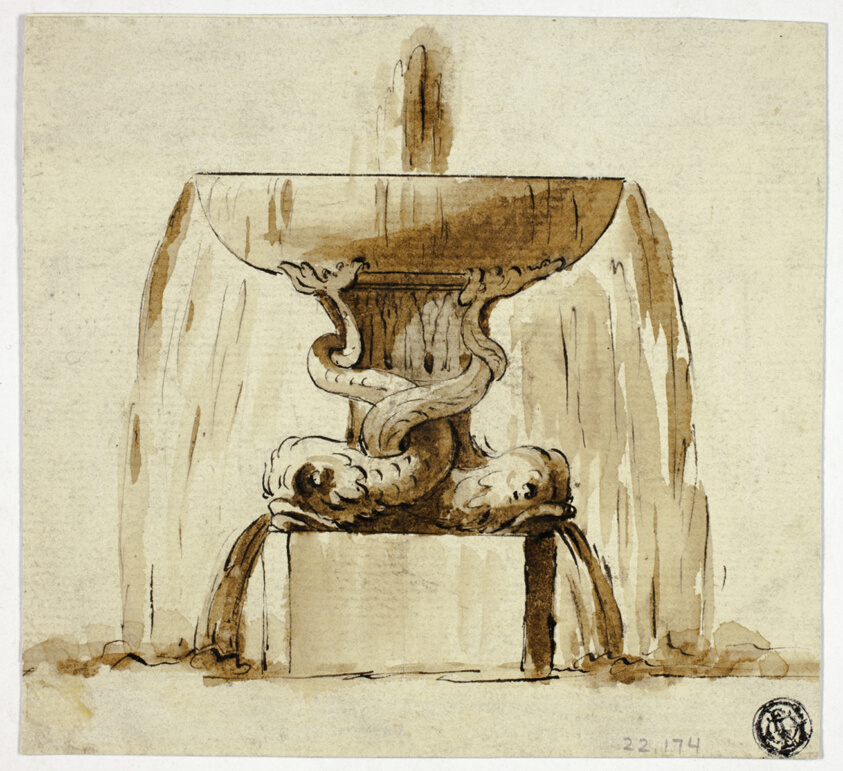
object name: Drawing and Watercolor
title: Fountain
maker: Theophile Fragonard (French, 1806-1876); or the style of Bon Boullongne (French, 1649-1717); or a follower of Lodovico Carracci (Italian, 1555-1619)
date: 1826-1876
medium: Pen and brown ink with brush and brown wash, on cream laid paper, laid down on blue laid paper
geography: France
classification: drawings (visual works); prints and drawing